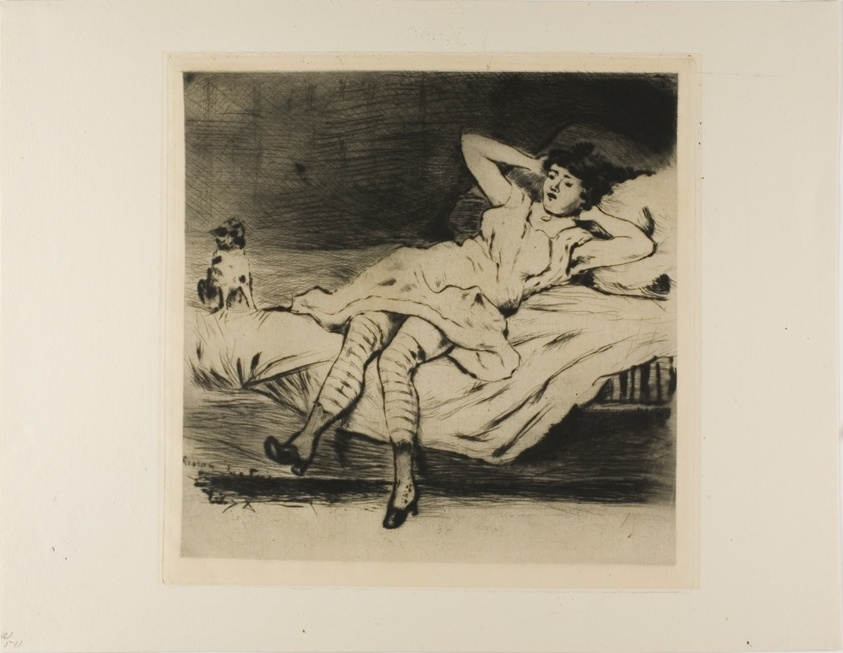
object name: Print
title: Plate from l'Assommoir (dancer reclining on bed, with cat)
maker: Gaston La Touche (French, 1854-1913)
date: 1878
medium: Drypoint and plate tone on ivory laid paper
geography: France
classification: drypoint; print; prints and drawing